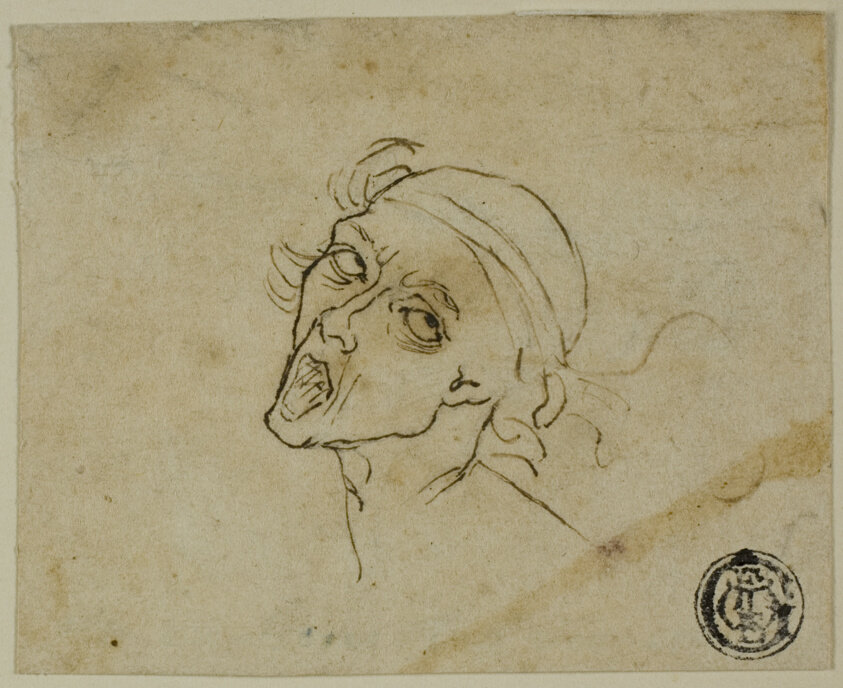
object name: Drawing and Watercolor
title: Male Head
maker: Possibly after Michelangelo Buonarroti; Italian, 1475-1564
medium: Pen and black and brown ink, on cream laid paper, hinged onto cream wove paper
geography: Italy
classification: pen and ink drawings; drawings (visual works); prints and drawing